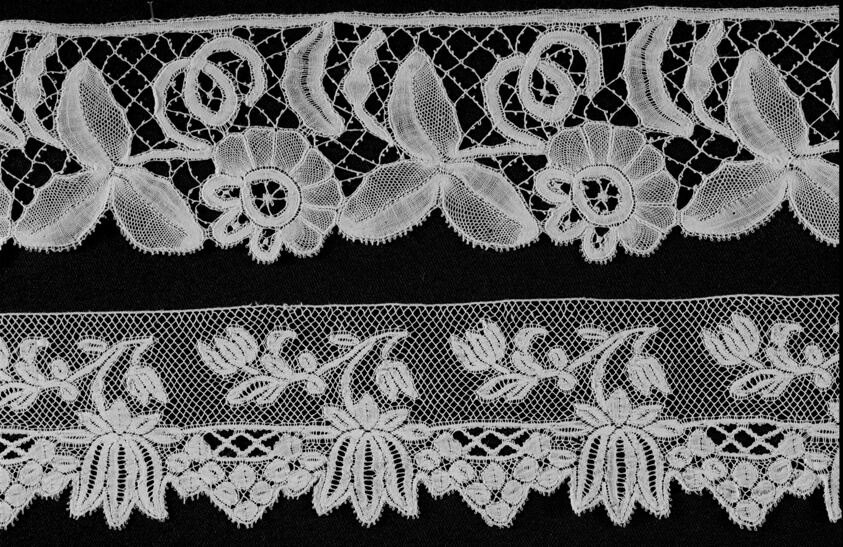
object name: Textile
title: Four Borders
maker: Belgium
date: 1865/85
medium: Cotton, bobbin straight lace of a type known as "Valenciennes" with a square Valenciennes mesh ground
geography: Belgium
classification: textile; lace - bobbin